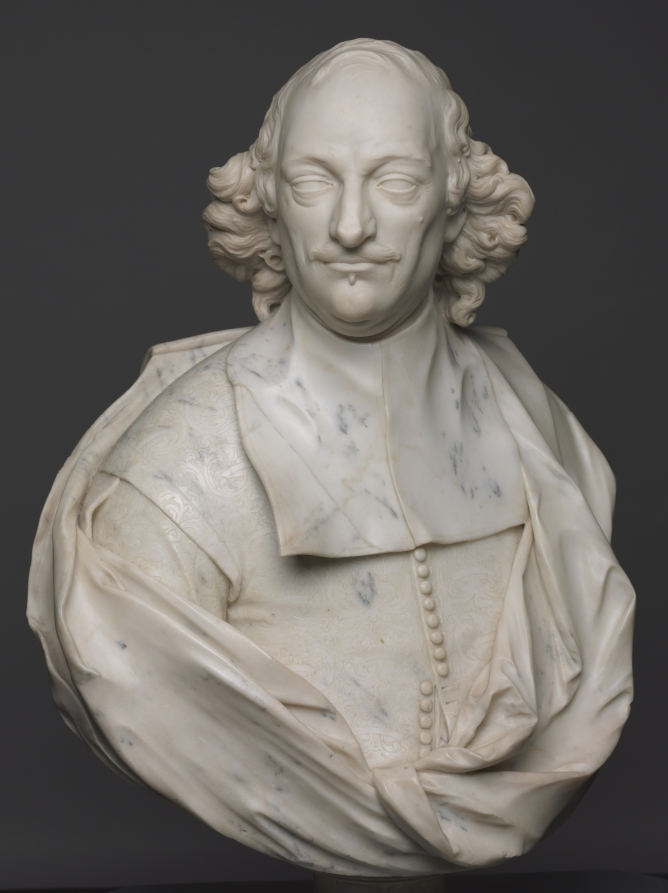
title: Portrait of Fabrizio Naro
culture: Italy, Rome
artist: Domenico Guidi (Italian, 1625–1701)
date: c. 1680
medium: marble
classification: Sculpture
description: This figure’s individualized facial expression, dynamic turn of the head and animated drapery are all characteristic of 17th-century Roman portrait sculpture. Guidi, a pupil of Alessandro Algardi, juxtaposed broad swaths of drapery and deeply drilled and carved hair with delicate surface detail, visible here in the patterning of the jacket and the faint suggestion of a beard. Based on a comparison with a later portrait on the family tomb in the church of Santa Maria sopra Minerva, Rome, the sitter has been identified as Fabrizio Naro (d. 1697), marquis of Mompei.